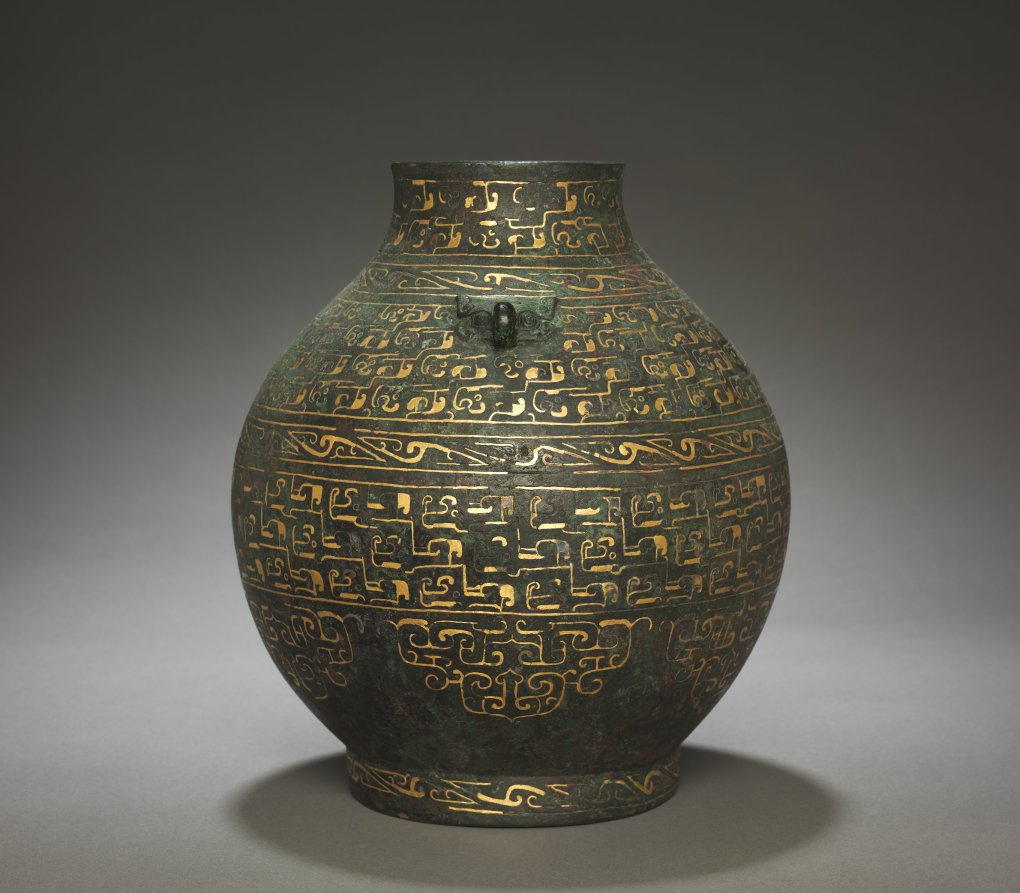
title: Wine Vessel (Hu)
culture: China, Warring States period (475–221 BCE)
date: early 400s BCE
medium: bronze with gold inlay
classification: Metalwork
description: By the time this wine vessel was cast, bronzes were increasingly losing their ritual significance and becoming symbols of prestige and conspicuous consumption. This globular jar (hu) reflects the splendor and luxury of the time. The jar is decorated with free-flowing scrollwork and interlaced zoomorphic motifs. Cast depressions were first made on the bronze surface and then inlaid with gold. A graceful fluidity is achieved by the many sweeping lines, curves, and tendril-like networks covering the round body.